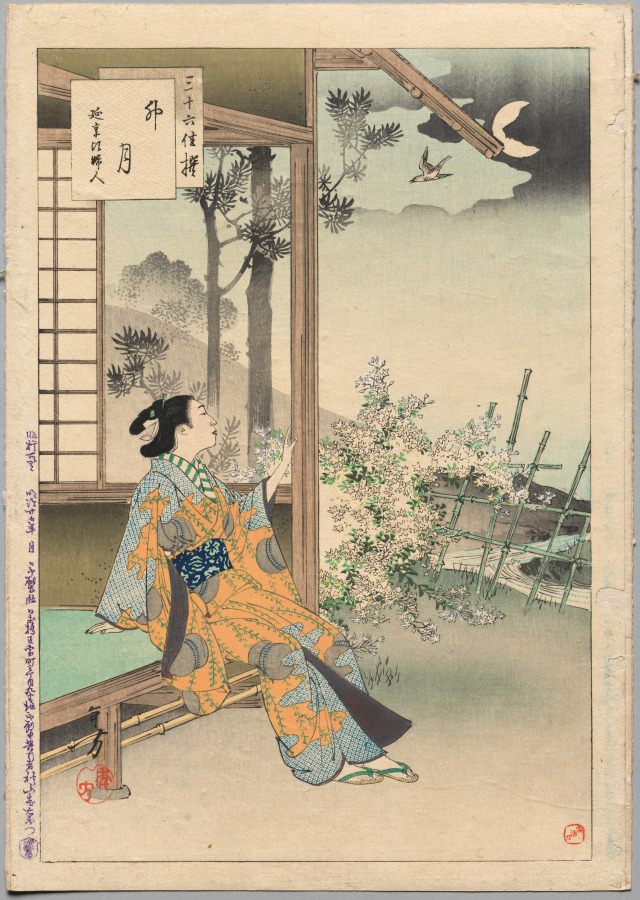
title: The Fourth Month, A Lady of the Enkyō Era (1744-48), from the series Thirty-six Elegant Selections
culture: Japan, Meiji period (1868–1912)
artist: Mizuno Toshikata (Japanese, 1866–1908)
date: 1894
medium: Woodblock print, ink and color on paper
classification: Print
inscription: Inscription Type: series title Inscription Transliteration: 三十六佳撰 Inscription Romanization: Sanjūrokkasen Inscription translation: The Thirty-six Elegant Selections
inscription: Inscription Transliteration: 卯月延享頃婦人 Inscription Romanization: Uzuki, Enkyō koro fujin Inscription translation: Fourth Month, A Lady of the Enkyō Era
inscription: Inscription Type: artist’s signature Inscription Transliteration: 年方 Inscription Romanization: Toshikata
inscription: Inscription Type: artist’s seal Inscription Transliteration: 應斎年方 Inscription Romanization: Ōsai Toshikata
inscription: Inscription Type: engraver’s seal Inscription Transliteration: えん活刀 Inscription Romanization: En-Katsu to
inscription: Inscription type: date and publisher’s information Inscription Translation: Meiji 27 (1894) Akiyama Buemon (summary)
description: Each of the prints in the series Thirty-six Elegant Selections features a woman from a different time period, as befits an artist who was interested in history painting. Most of the prints are set in the Edo period (1615–1868). Mizuno Toshikata was a favored student of Tsukioka Yoshitoshi (1839–1892), and took over his post as a newspaper illustrator.